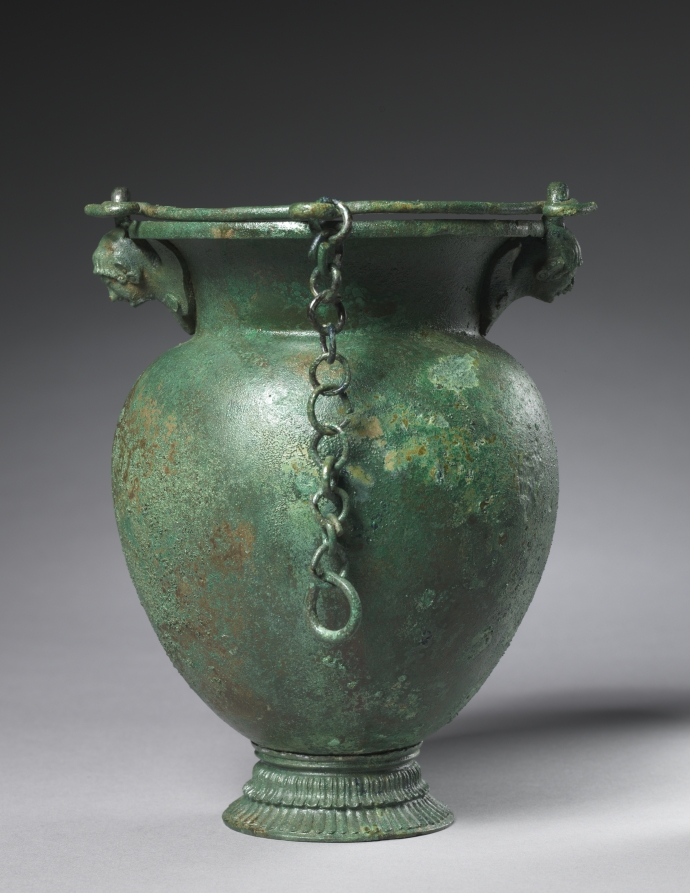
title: Situla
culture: Etruscan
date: c. 525–450 BCE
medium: bronze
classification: Metalwork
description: Known as a situla, or bucket, this bronze vessel features an ovoid body with a flaring neck. The separately made foot is quite elaborate and unusually shaped for this type of vessel. More typical is the handle, designed to swing upward from its two attachments, each finely cast in the form of a frontal siren with earrings and very small, simplified wings.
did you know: The handle includes a loop with attached chain, perhaps meant for hanging.